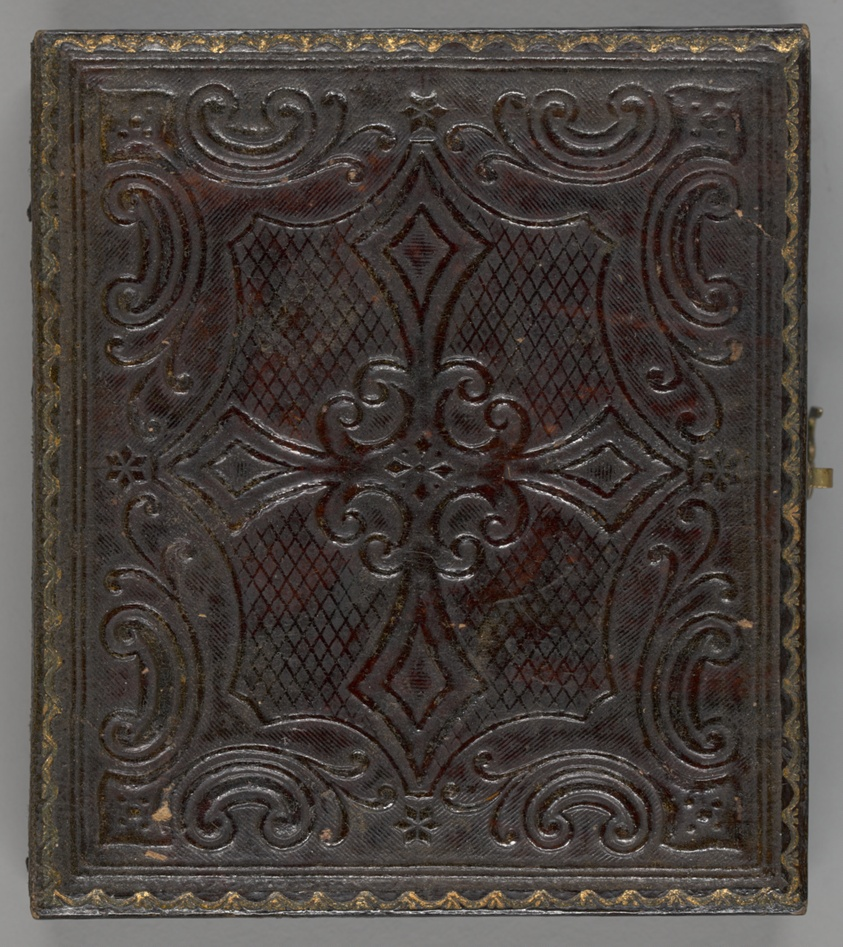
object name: Photograph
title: Untitled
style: 19th century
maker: Artist unknown; American, 19th century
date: 1839/60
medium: Daguerreotype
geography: United States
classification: daguerreotype; photographic process; photography; photograph